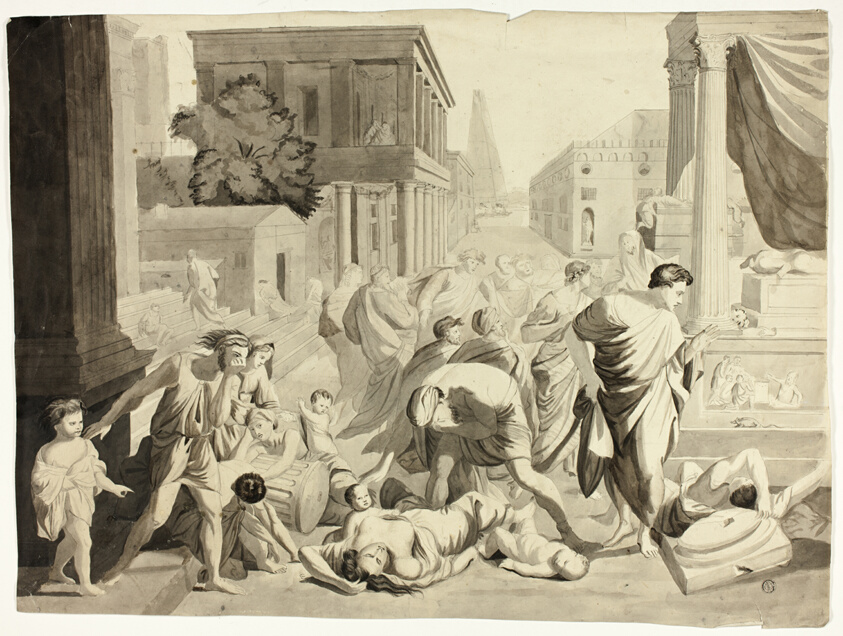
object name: Drawing and Watercolor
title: Plague of Ashdod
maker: Unknown Artist; after Nicolas Poussin (French, 1594-1665)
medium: Pen and black ink and brush and black, gray, and brown wash, over graphite, on cream wove paper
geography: France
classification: ink or chalk wash; paper; brush and wash; pen and ink drawings; drawings (visual works); prints and drawing